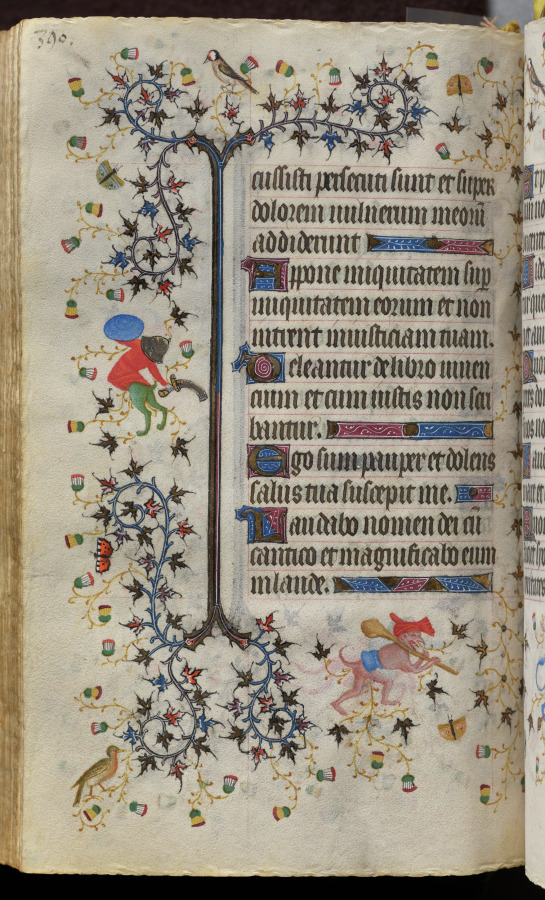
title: Hours of Charles the Noble, King of Navarre (1361-1425): fol. 189v, Text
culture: France, Paris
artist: Master of the Brussels Initials and Associates (French)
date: c. 1405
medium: ink, tempera, and gold on vellum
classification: Bound Volume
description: This precious volume was obviously highly prized by its owner, the French-born King of Navarre, who had his coat of arms painted on no less than twenty folios. Rather than directly commissioning this manuscript from a specific workshop, it seems that Charles the Noble acquired his book of hours -- perhaps ready-made for the luxury market -- while on a trip to Paris in 1404-05. A collaborative effort, six painting styles are evidenced within the pages of this codex, those of two Italians, two Frenchmen, and two Netherlanders. The painter who was responsible for the planning and decoration of the book, and who produced seventeen of the large miniatures, was a Bolognese artist known as the Master of the Brussels Initials. His principal assistant, responsible for most of the borders, was a Florentine who signed his name "Zecho" da Firenze on folio 208 verso.